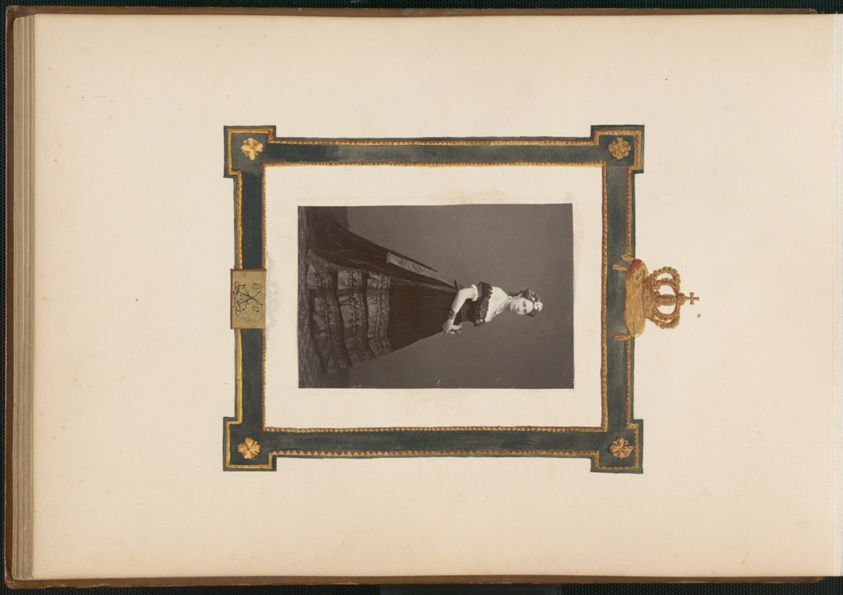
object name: Photograph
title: The Madame B Album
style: 19th century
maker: Marie-Blanche Hennelle Fournier (French, 1831–1906)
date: 1870s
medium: Albumen print with watercolor (in album)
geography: France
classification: photograph; albumen silver print; photography